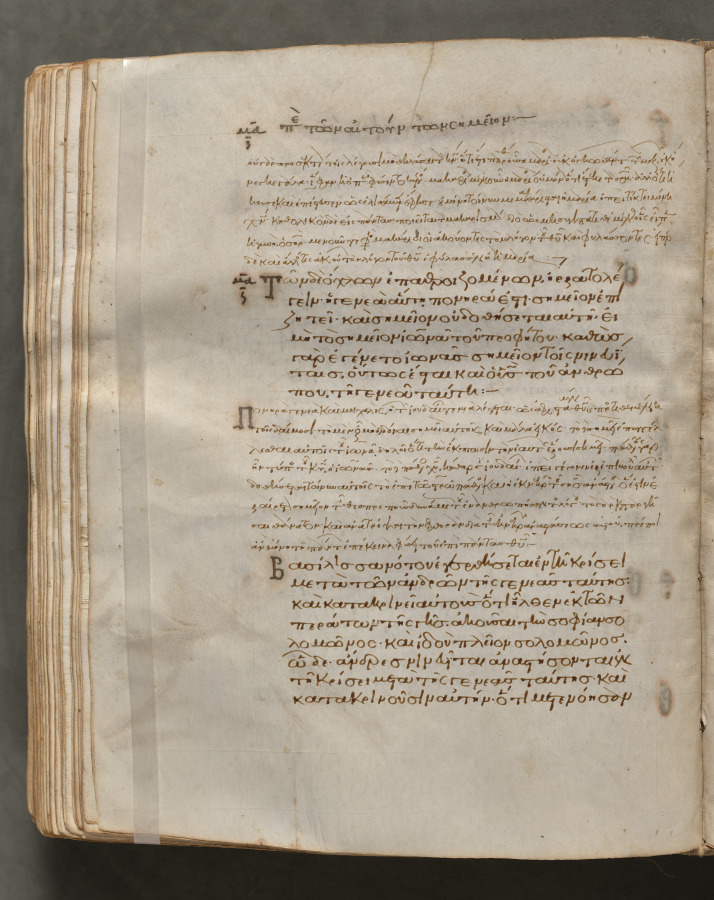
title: Text, folio 261 (verso), from a Gospel Book with Commentaries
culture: Byzantium, Constantinople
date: c. 1000–1100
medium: ink, tempera, and gold on vellum; leather binding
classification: Bound Volume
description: Each of the four gospels in this book opens on a page with brilliantly illuminated borders depicting the author of the text as well as birds—principally peacocks, symbols of the immortality of the soul—and fountains, representing the fountain of life and the salvation of the soul. This volume consists of 428 leaves with texts in Greek. Its level of sophistication suggests that it was probably written and decorated in a monastery in Constantinople.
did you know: Gospel books were carried in procession through Byzantine churches.